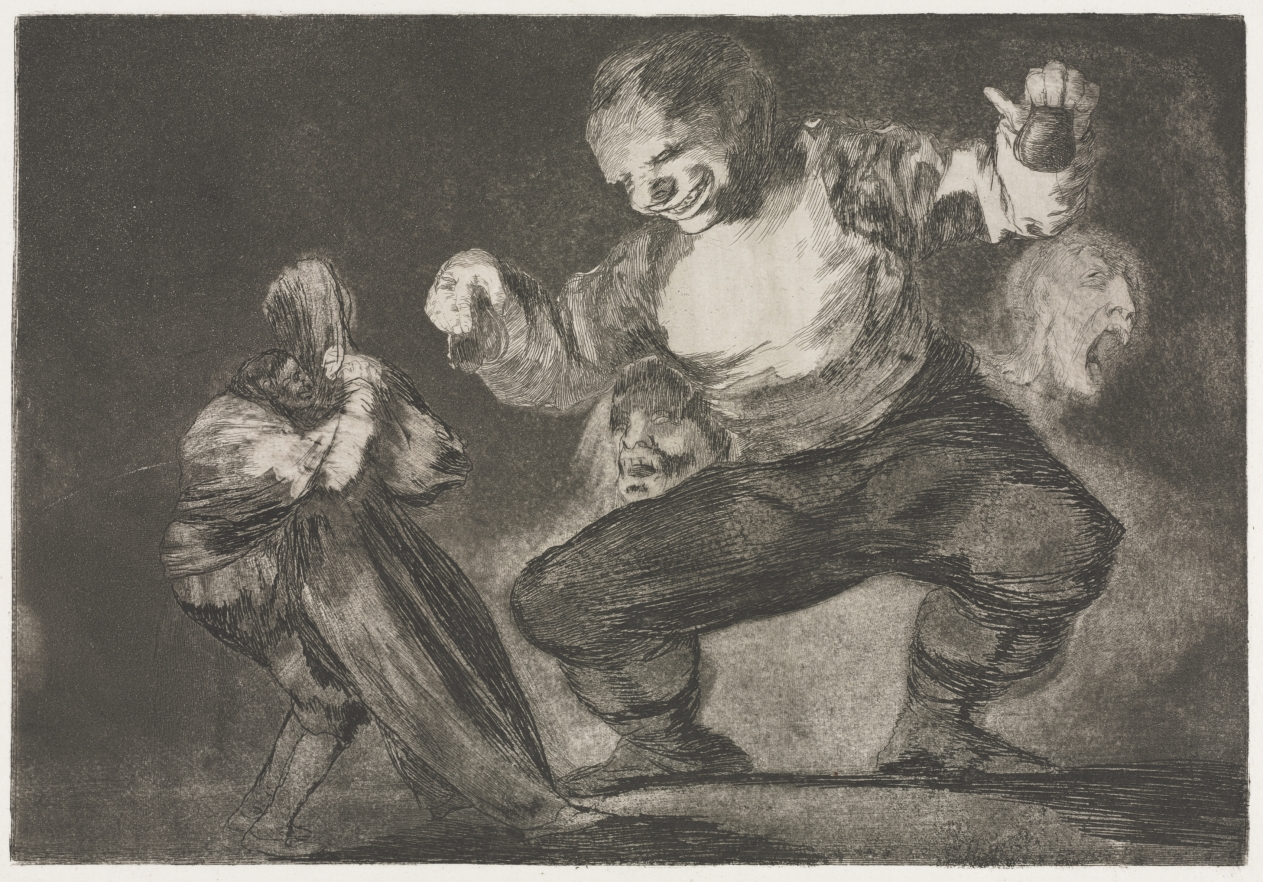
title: The Proverbs: Simpleton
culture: Spain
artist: Francisco de Goya (Spanish, 1746–1828)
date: 1864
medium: etching and aquatint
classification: Print